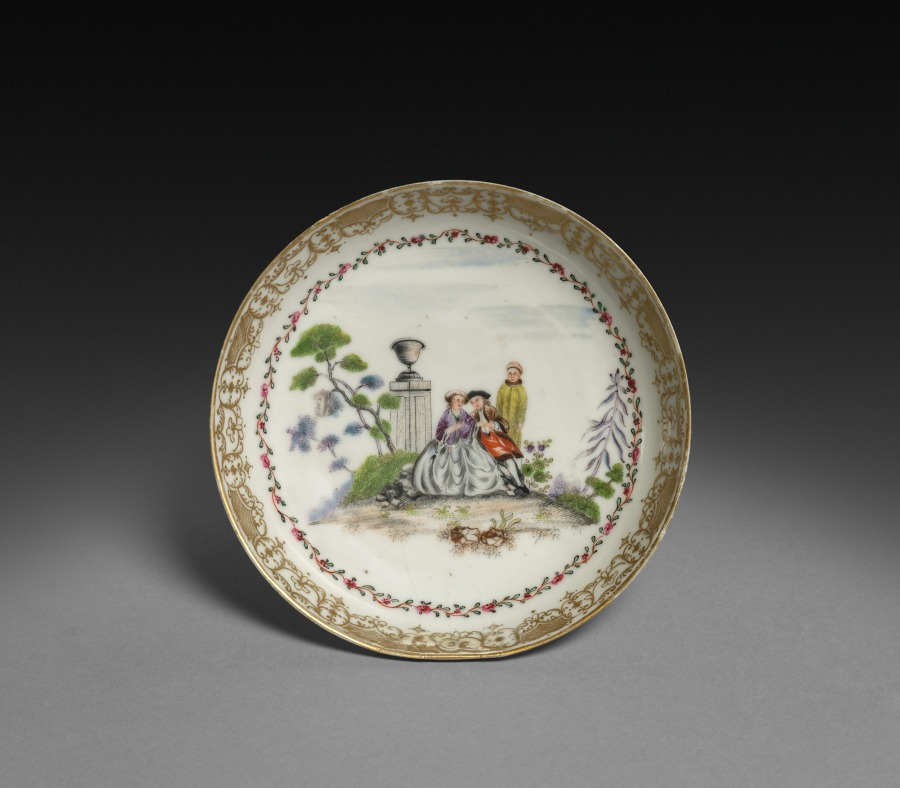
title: Saucer with Scene in style of Watteau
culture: China, Chinese Export -- Continental Market, 18th century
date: c. 1750–60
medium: porcelain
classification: Ceramic